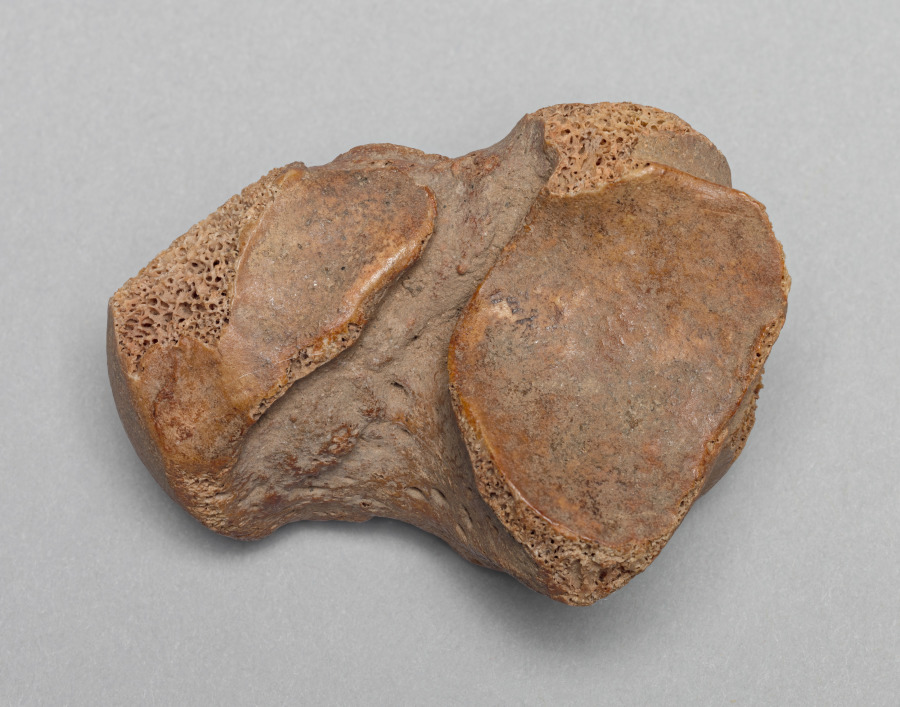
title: Relic of St. Januarius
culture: Germany, Lower Saxony?, Romanesque period, 11th century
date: c. 1045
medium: Bone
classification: Metalwork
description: This relic is housed in the portable altar commissioned by Countess Gertrude of Brunswick, which is one of the Guelph Treasure’s earliest and most sumptuous objects.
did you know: This bone is a nearly complete ankle joint (talus).